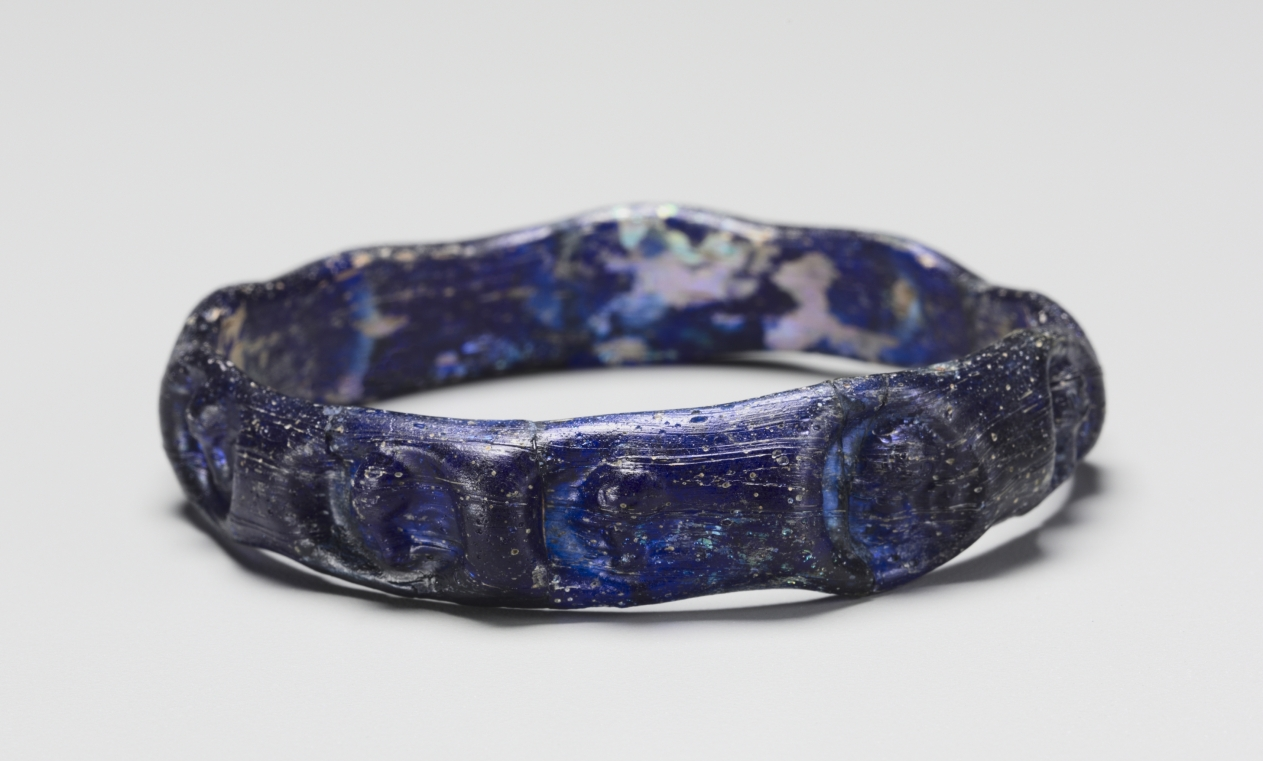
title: Bracelet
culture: Syria, Roman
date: 350–500 CE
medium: glass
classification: Glass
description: Jewelry made entirely of glass, such as this bracelet, held wide appeal in Roman society because of its potential to imitate more precious materials. The adaptability of glass offered an affordable alternative to the expensive items favored by the aristocracy, enabling less affluent Romans to follow imperial tastes.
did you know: The design on this bracelet was made by pressing a mold against the glass while it was still hot.